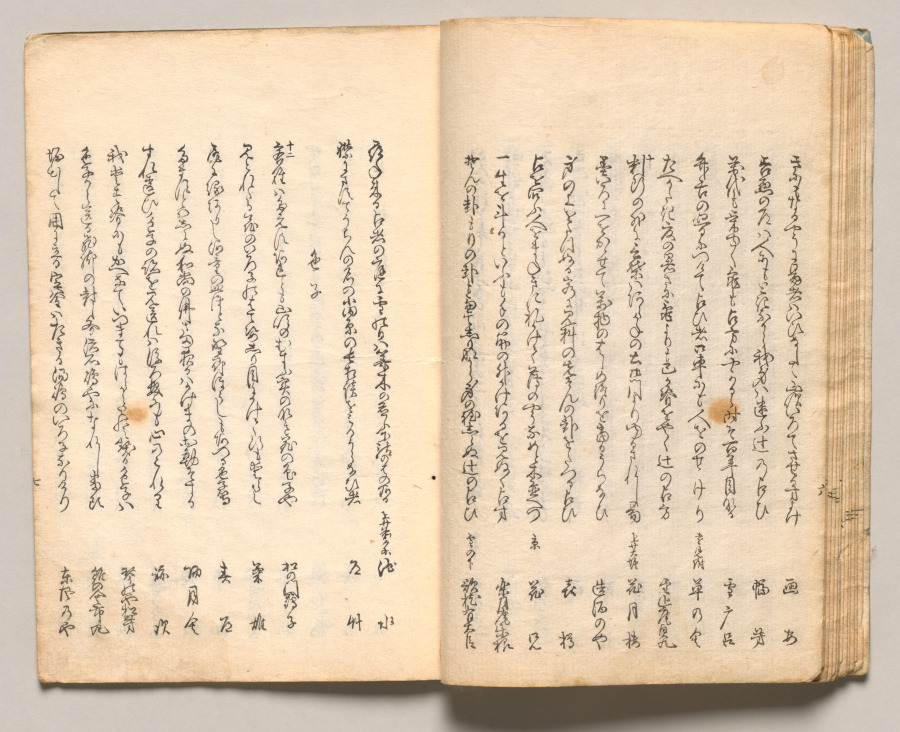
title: Spread Fourteen from Volume Two of People of Japan in Light Verse (Kyōka)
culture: Japan, Edo period (1615–1868)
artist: Utagawa Hiroshige (Japanese, 1797–1858)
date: 1857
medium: Woodblock-printed book; ink and color on paper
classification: Bound Volume